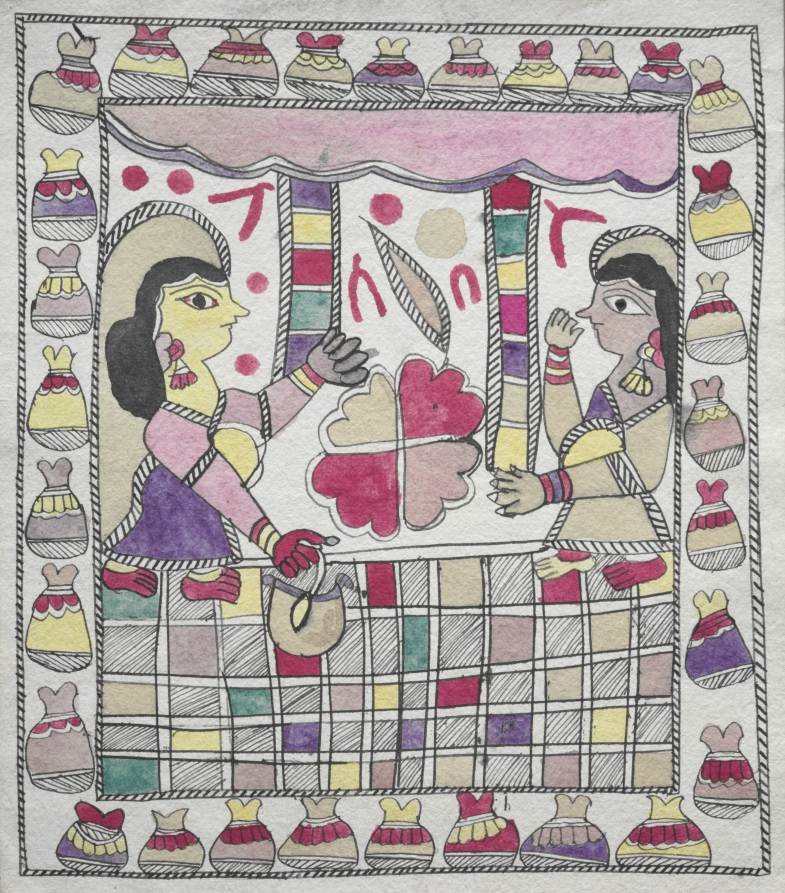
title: Two Women facing each other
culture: Eastern India, Bihar State, Mithila or Madhubani School, 20th century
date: 1900s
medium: ink and color on paper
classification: Painting